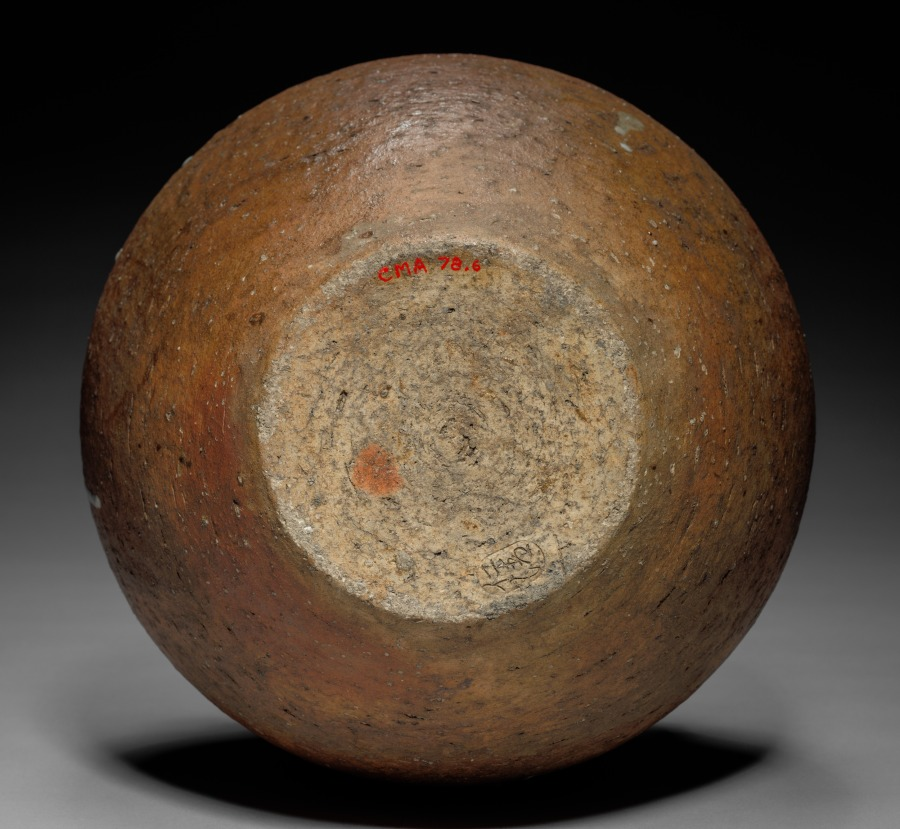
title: Tea Storage Jar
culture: Japan, Edo period (1615–1868)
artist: Nonomura Ninsei (Japanese, active 1640s–90s)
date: mid- to late 1600s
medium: Stoneware with white glaze (Shigaraki style)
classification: Ceramic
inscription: Ninsei seal impressed in the clay on bottom.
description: In this tea storage jar, Nonomura Ninsei reinterpreted a Shigaraki stoneware—made to hold agricultural products and known for its warm orange color, asymmetrical round forms, and irregular natural ash glazes—to produce a more refined piece that would appeal to tea masters seeking a touch of rusticity. In Japanese tea culture, hanging scroll paintings or calligraphy are placed in the tokonoma, or viewing alcove, for participants to admire and discuss along with the utensils used in the gathering. The scrolls are typically paired with vessels containing seasonal floral arrangements.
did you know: This jar may be considered an example of the aesthetic known as kireisabi, or refined rusticity.